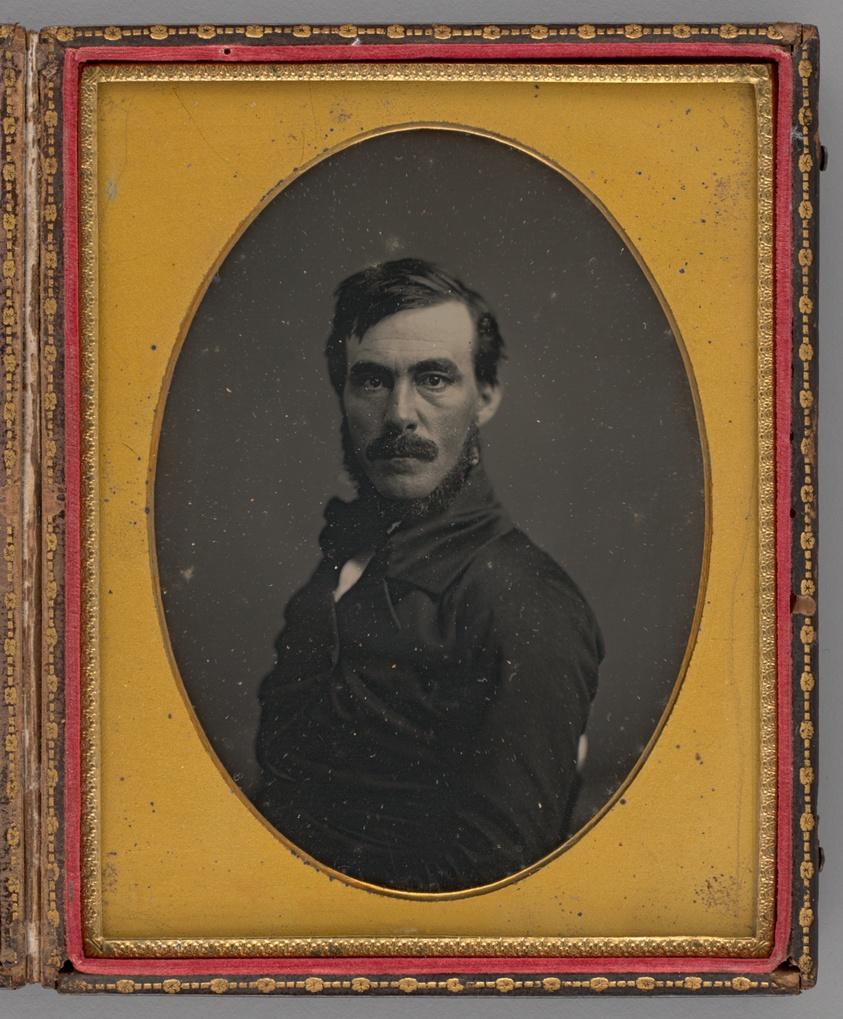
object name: Photograph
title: Untitled (Portrait of a Man)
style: 19th century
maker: Unknown maker; American, 19th century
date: 1855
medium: Daguerreotype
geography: United States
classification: portrait; photograph; photographic process; photography; portrait; daguerreotype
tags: lundberg collection, portraits, portraits: male subject, Male, photography